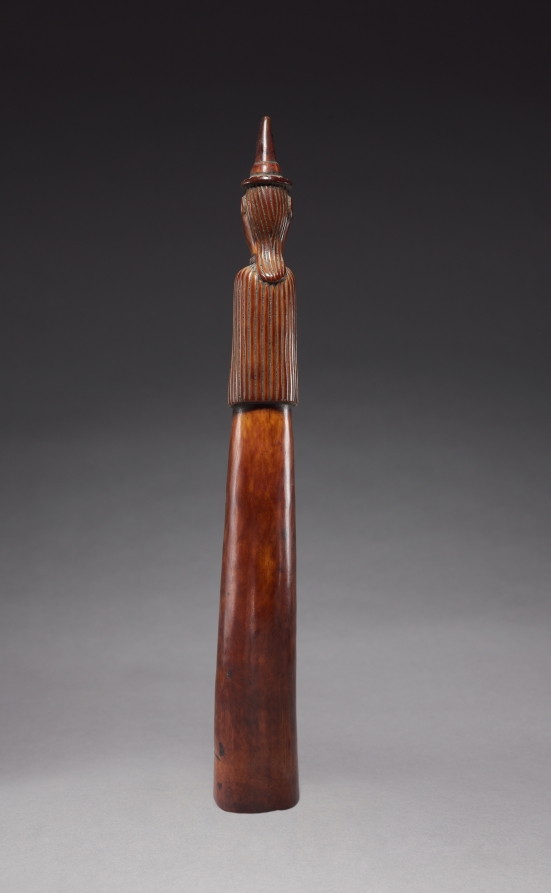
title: Oliphant (Side-Blown Trumpet)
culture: Africa, Central Africa, Democratic Republic of Congo (most likely), Cabinda, or Republic of the Congo, probably Yombe-style maker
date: late 1800s–early 1900s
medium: Ivory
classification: Musical Instrument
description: Side-blown trumpets were used on various occasions, and ivory examples seem to have been reserved for more solemn circumstances, such as funerals. As the mouthpiece is located on the inner curve, the person who played this instrument held it horizontally. A seated male Yombe ruler wearing a shell necklace and a European-style cloak and hat is carved on top. His blended dress shows how Yombe people (a Kongo sub-group) selectively adopted elements of foreign dress to wear with their own fashions.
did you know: Kongo Kingdom rulers sent ornately carved large side-blown trumpets to Europe as diplomatic gifts during the sixteenth century.